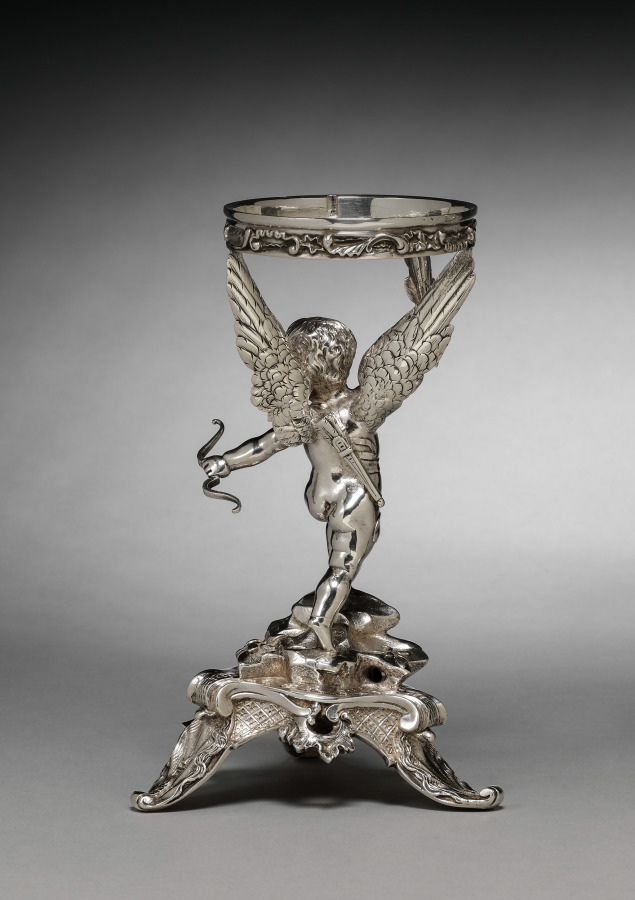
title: Stand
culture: Russian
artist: House of Fabergé (Russian, 1842–1918)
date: c. 1890–99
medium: silver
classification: Silver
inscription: Inscribed “K. Fabergé” in Cyrillic, surmounted by the double-headed Imperial eagle.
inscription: “88” silver standard